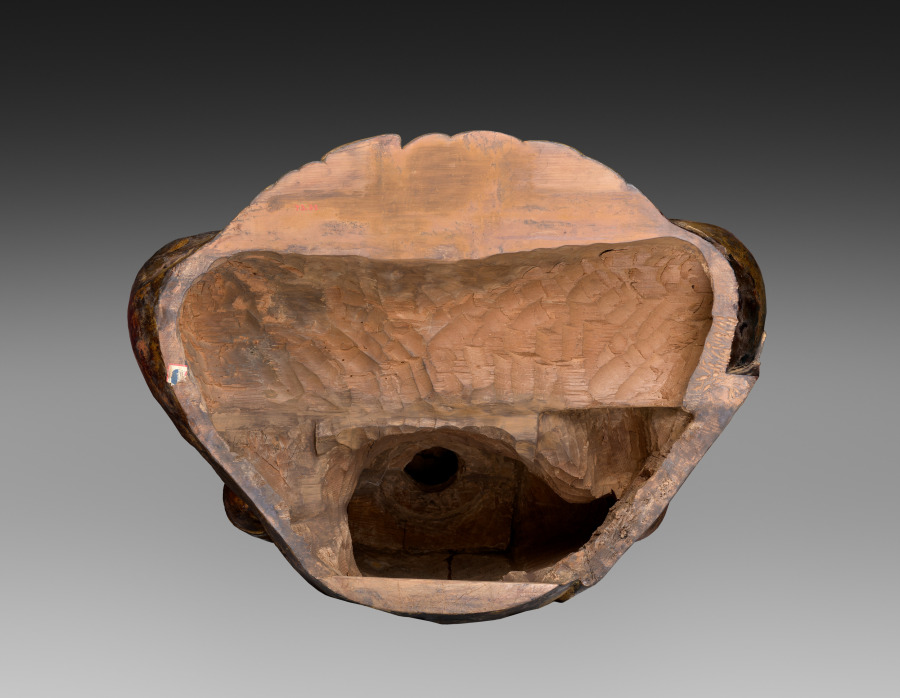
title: Seated Buddha (sculpture)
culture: Japan, Heian period (794–1185)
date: 1100s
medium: gilded wood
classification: Sculpture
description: Composed of a number of hollowed-out pieces of wood that were then covered with lacquer and gilding, this sculpture served as an image of worship in one of the small temples surrounding Kōfukuji, a major Buddhist temple in Nara, Japan. Like many Buddhas, this figure has its right hand positioned in a gesture meaning "fear not." The left hand is a replacement, so its original gesture, a clue to this Buddha's identity, is unknown. However, as the left foot is exposed over the garment, in lotus position, it may have been created as a Medicine Master Buddha, Yakushi Nyorai in Japanese, or the Buddha of our era, Shakyamuni.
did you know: This Buddha is sculpted in the Jōchō style, associated with the sculptor of the Amida at Byōdō'in in Uji.